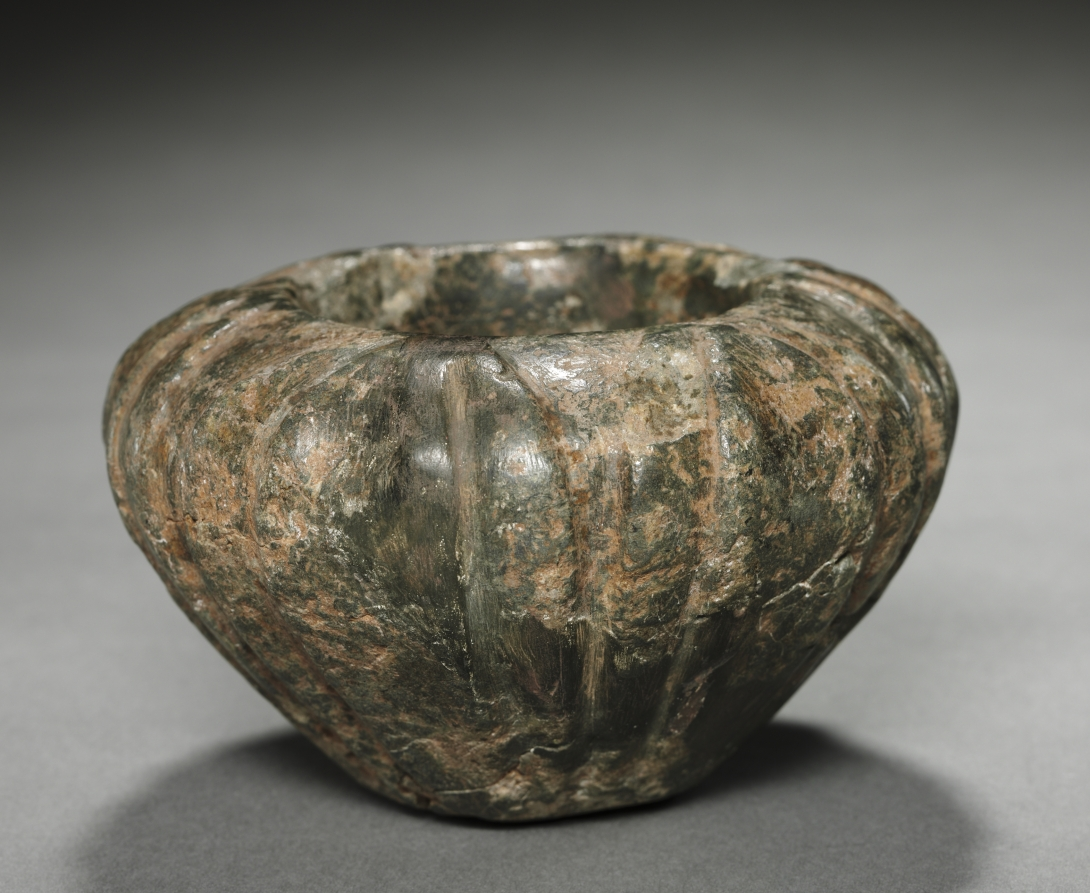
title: Minoan Petal Bowl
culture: Crete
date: 1600–1500 BCE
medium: stone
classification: Stone